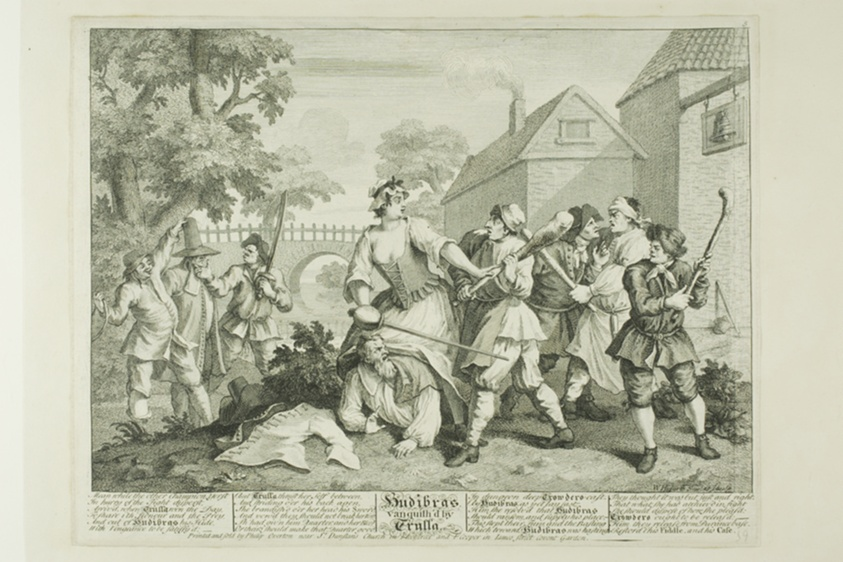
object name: Print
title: Hudibras Vanquished by Trulla, plate five from Hudibras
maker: William Hogarth (English, 1697-1764)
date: February 1725/26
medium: Etching and engraving in black on cream paper edge mounted on cream wove paper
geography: England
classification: engraving; prints and drawing; print; etching